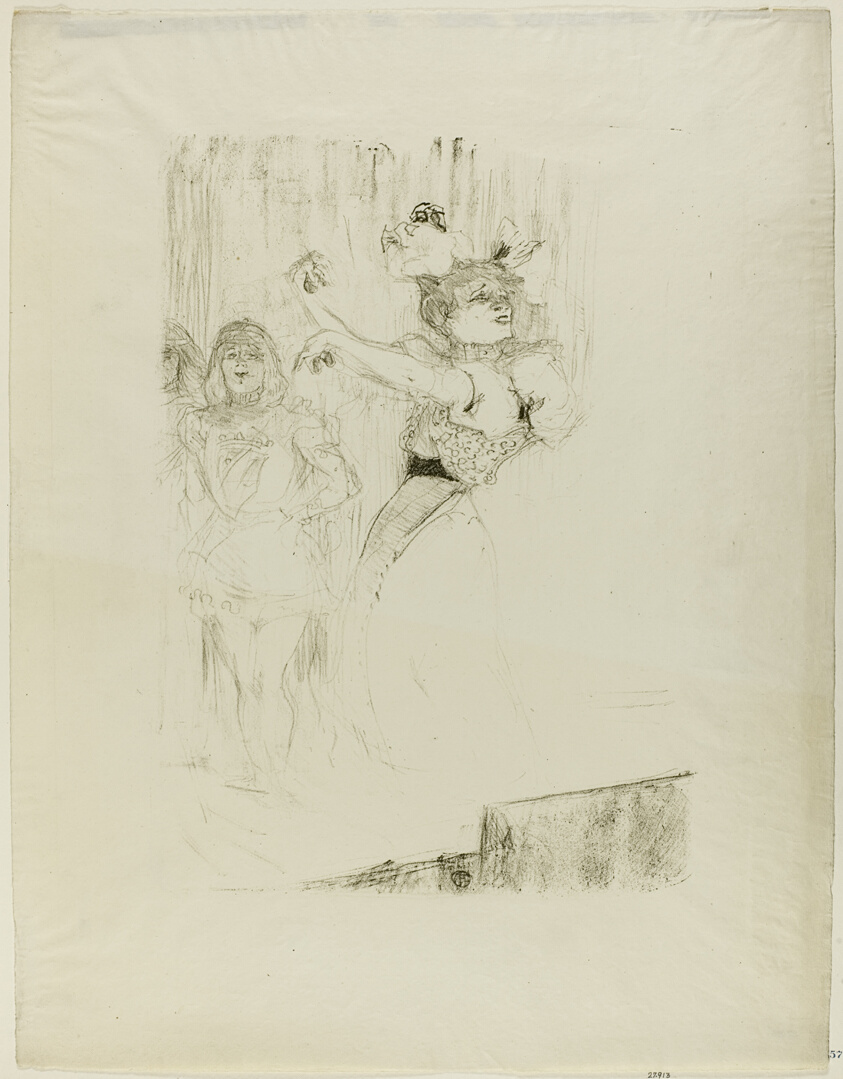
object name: Print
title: Lender Dancing the Bolero in Chilpéric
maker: Henri de Toulouse-Lautrec (French, 1864-1901)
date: 1895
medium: Color lithograph on cream wove paper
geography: France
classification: lithograph; print; prints and drawing